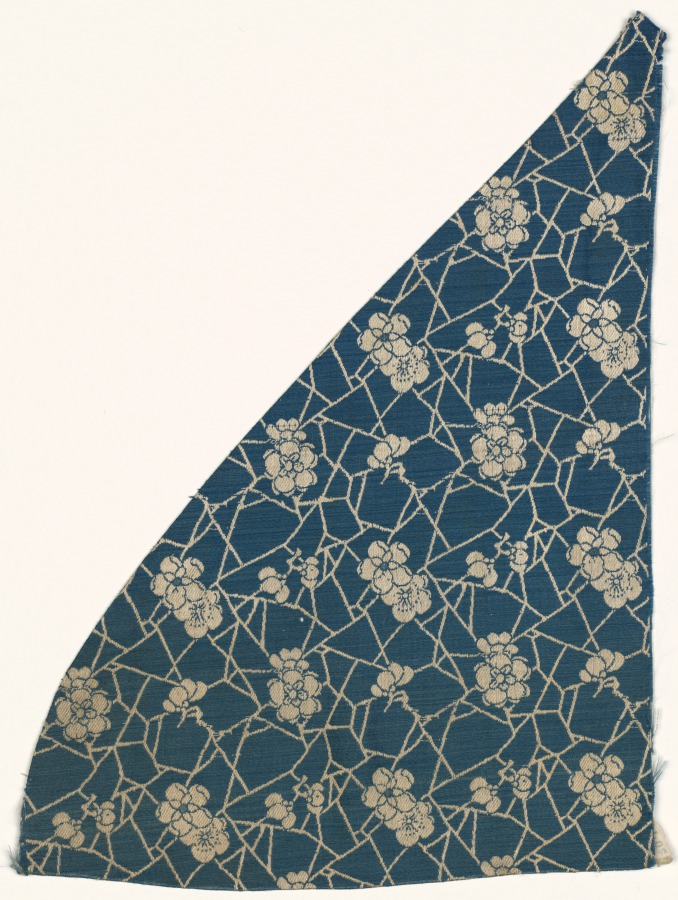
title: Fragment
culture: China, 19th century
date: 1800s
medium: silk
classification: Textile